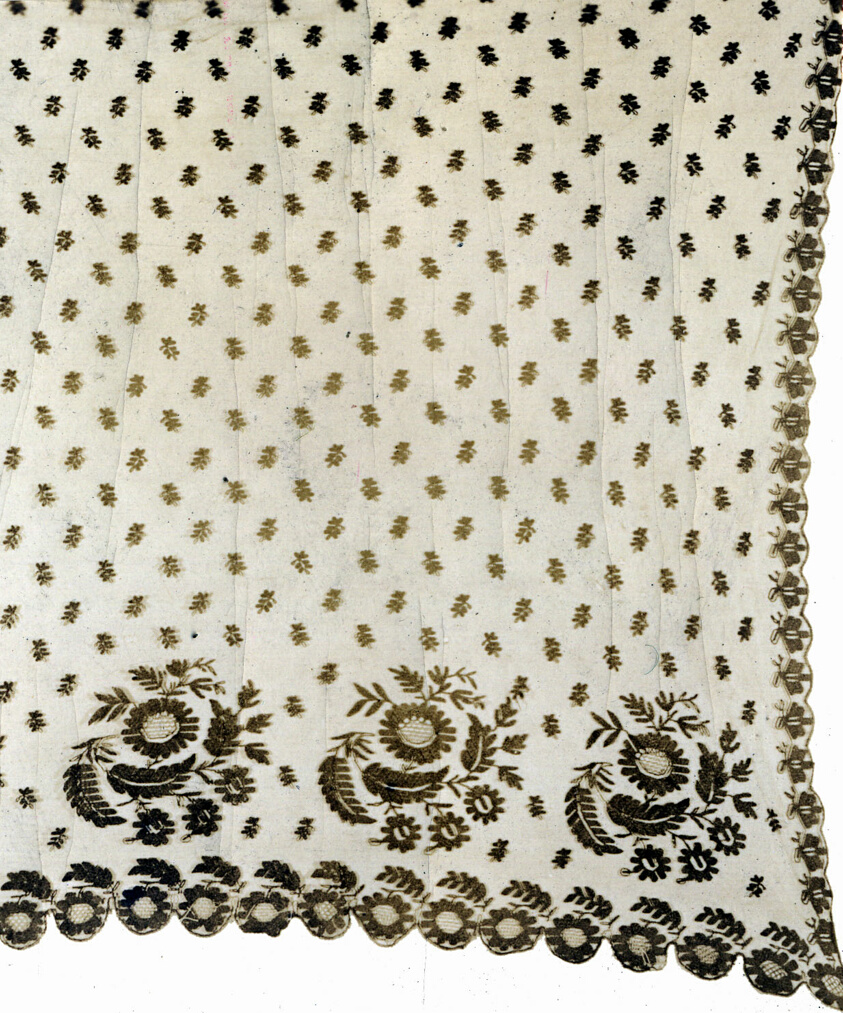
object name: Textile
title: Veil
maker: Mary Chadbourne Keith Norton (American, 1807-1890); United States, probably Maine, South Berwick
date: c. 1810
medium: Silk, machine-made net; embroidered with silk in darning, running, and wave filling stitches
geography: United States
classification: textile; lace - mixed